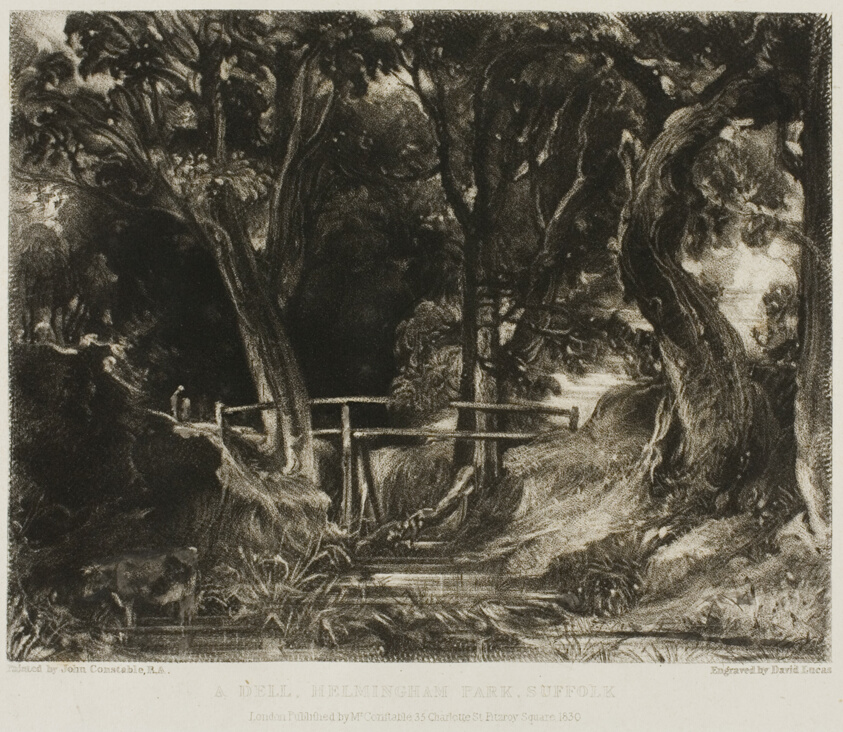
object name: Print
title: A Dell, Helmingham Park, Suffolk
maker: David Lucas (English, 1802-1881); after John Constable (English, 1776-1837)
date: 1830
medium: Mezzotint on paper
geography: England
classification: mezzotint; print; prints and drawing